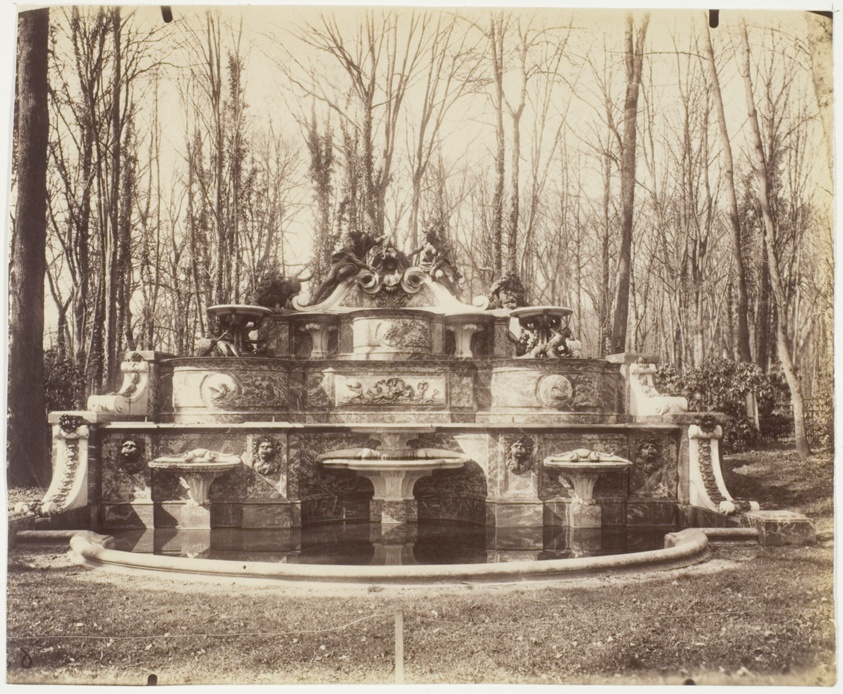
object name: Photograph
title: Versailles, Grand Triannon (Buffet par Mansard)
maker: Jean-Eugène-Auguste Atget (French, 1857–1927)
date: 1902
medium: Albumen print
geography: France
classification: albumen silver print; photographic process; photography; photograph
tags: Collected by Hugh Edwards